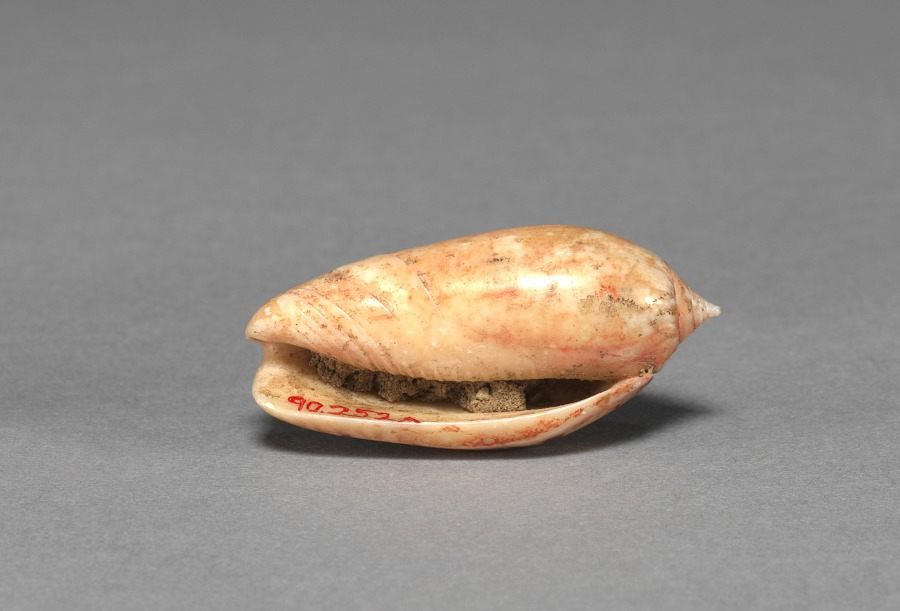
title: Offering Group: Small Shell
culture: Mexico, Guerrero(?), San Jerónimo de Juárez, Xochicalco style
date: c. 800–1200(?)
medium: shell, red pigment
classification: Sculpture